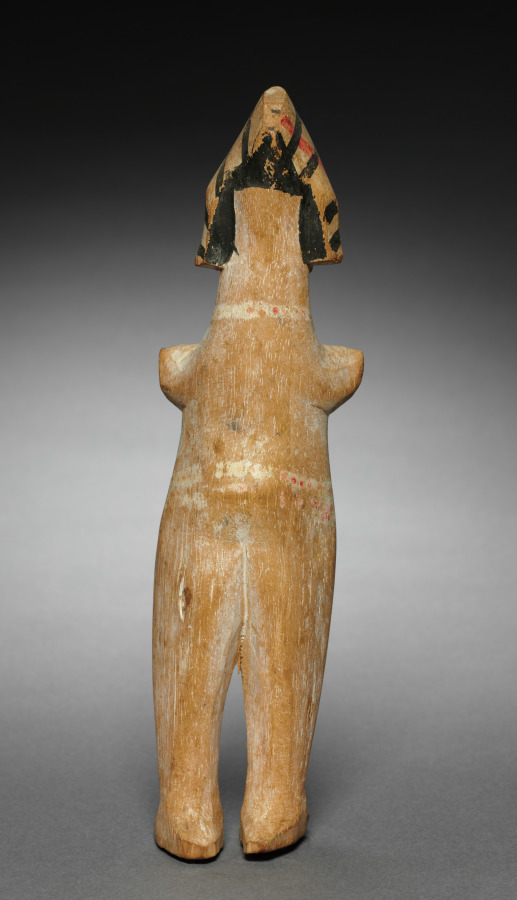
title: Doll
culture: Africa, West Africa, Nigeria, Ibibio style, unknown artist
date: 1900s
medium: Wood, kaolin, and paint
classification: Sculpture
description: Young Ibibio girls would play with dolls for fun. The dolls also took on deeper significance when a girl entered seclusion to go through preparations for adulthood and marriage, representing her future children and promoting her fertility. The kaolin (white clay) that once covered the figures' bodies has been worn off, possibly through handling during play. Thin lines represent uli, a kind of body painting. Upraised, foreshortened hands with open fingers were typical of dolls carved by Ibibio people from the Anang group.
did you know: Dolls like this were sold at markets where they were purchased as symbolic playthings for girls or souvenirs for tourists.